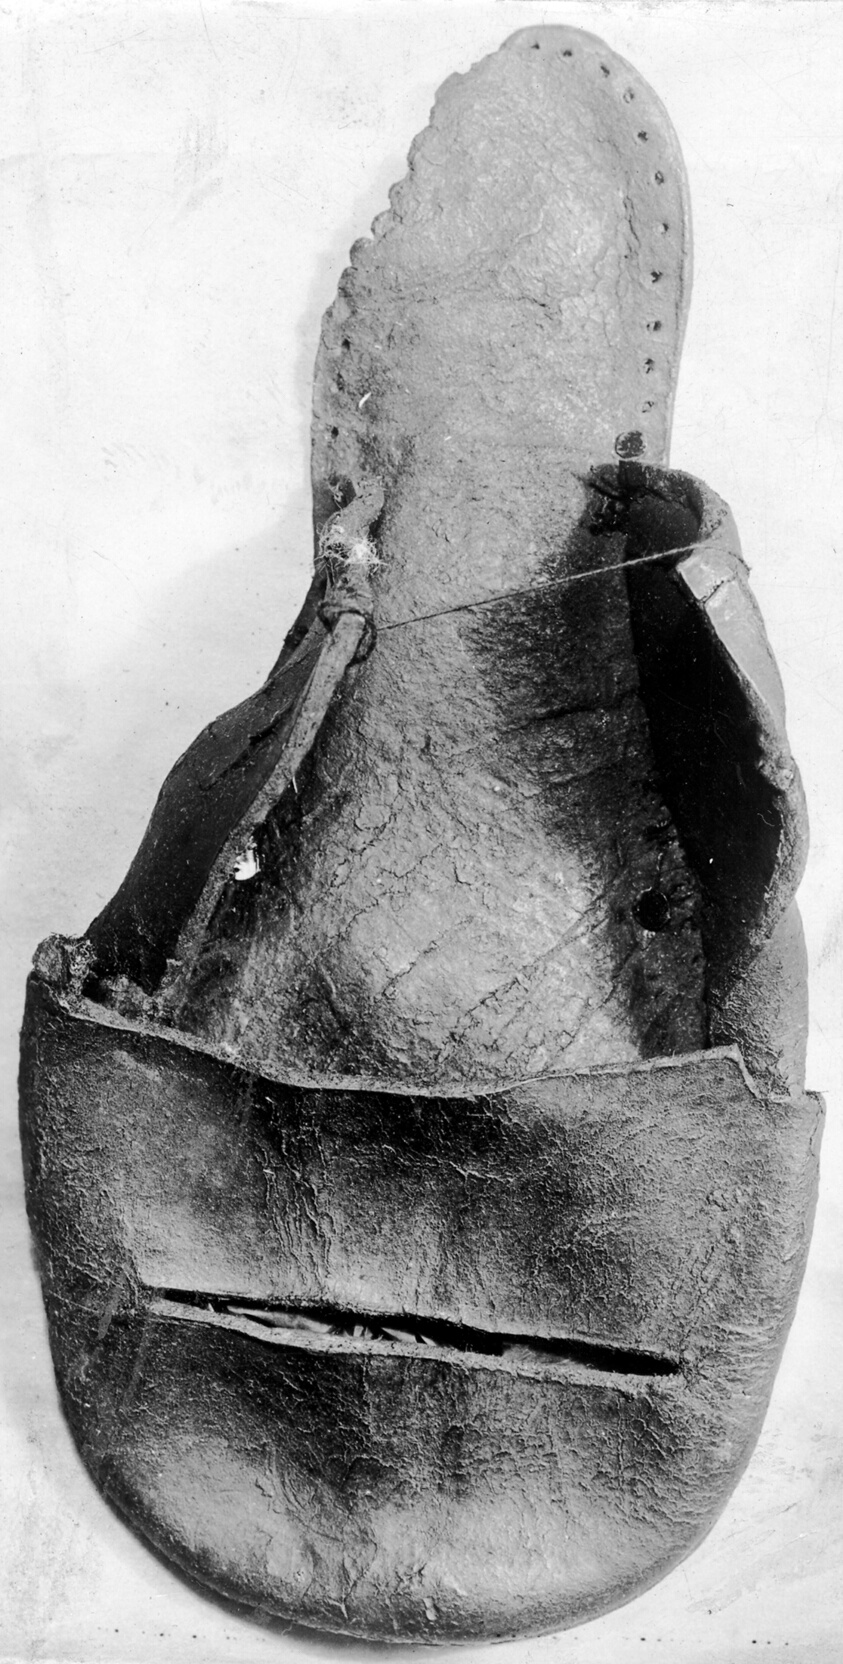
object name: Textile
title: Toe and Sole of a Shoe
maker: England; Found in London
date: 16th century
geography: England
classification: textile; shoes - misc; costume accessory - shoe; costume; dress (garment); clothing